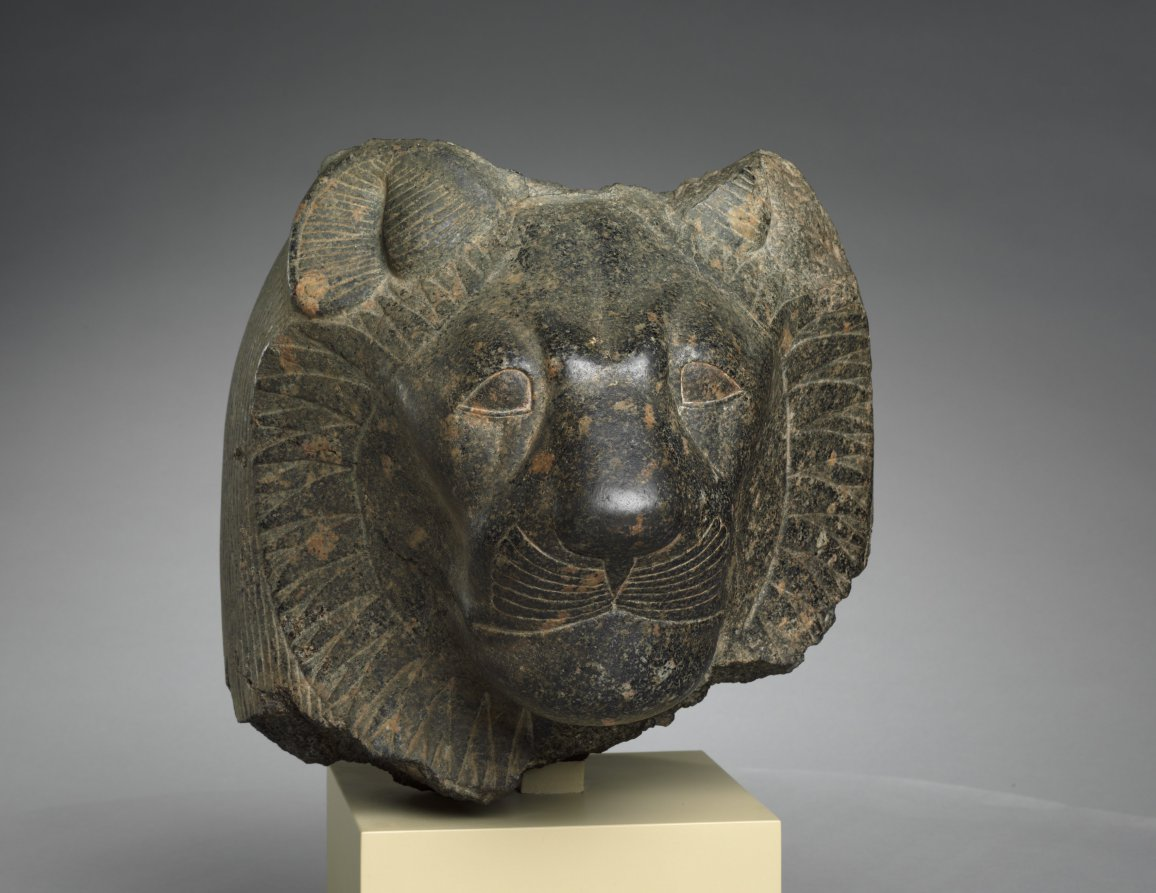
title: Head of Sekhmet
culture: Egypt, Thebes(?), New Kingdom (1540–1069 BCE), Dynasty 18, reign of Amenhotep III (1390–1352 BCE)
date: c. 1391–1353 BCE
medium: granodiorite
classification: Sculpture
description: This lioness head once belonged to a grand statue of the goddess Sekhmet, "the powerful one," probably seated and wearing a tight dress. Possibly appealing to her healing aspect, Pharaoh Amenhotep III, often described as “beloved of Sekhmet,” commissioned and dedicated hundreds of large granodiorite Sekhmet sculptures in his Theban mortuary temple. Thus, this head likely comes from Thebes, perhaps later moved across the Nile—like many such sculptures—to the temple of Mut, a related deity, at Karnak. Behind her stylized ruff, Sekhmet wears a wig, once crowned with a sun disk and uraeus, the stylized cobra symbolizing royal or divine power.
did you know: Amenhotep III may have dedicated 730 statues of Sekhmet, two for each day of the year.